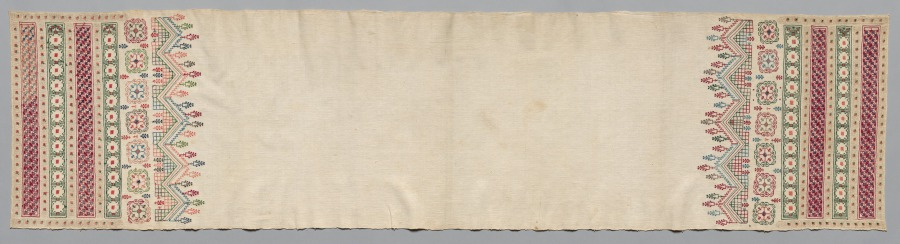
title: Embroidered Towel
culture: Turkey, early 20th century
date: early 20th century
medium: embroidery: silk on cotton tabby ground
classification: Embroidery